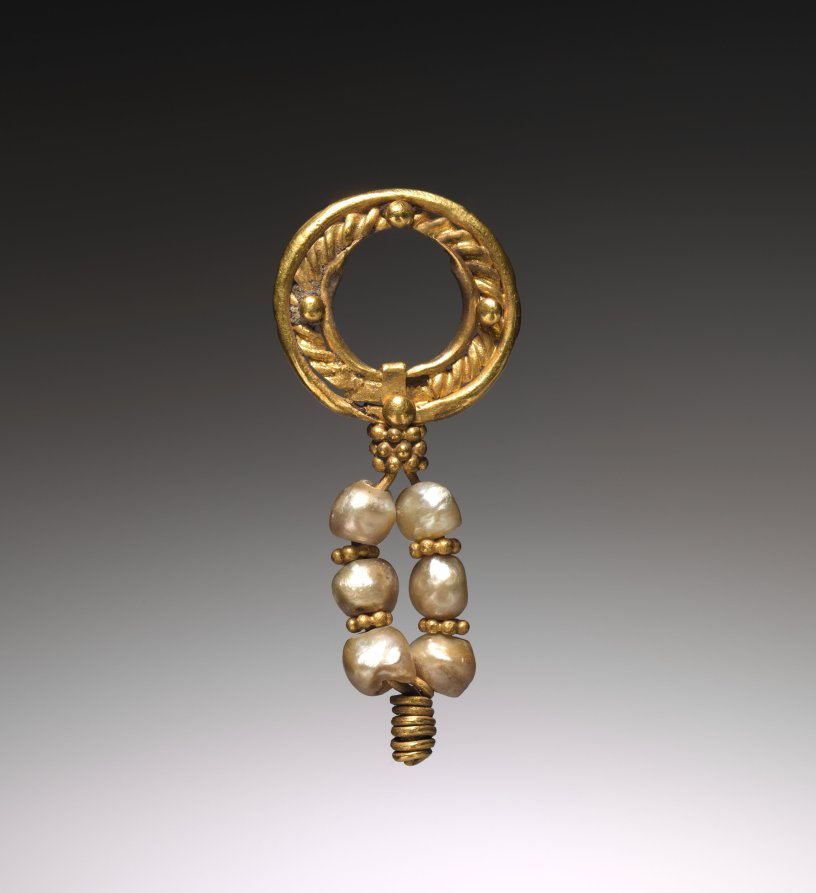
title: Pendant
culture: Byzantium (style of), probably 19th-20th century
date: probably 1800s-1900s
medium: gold with pearls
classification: Jewelry